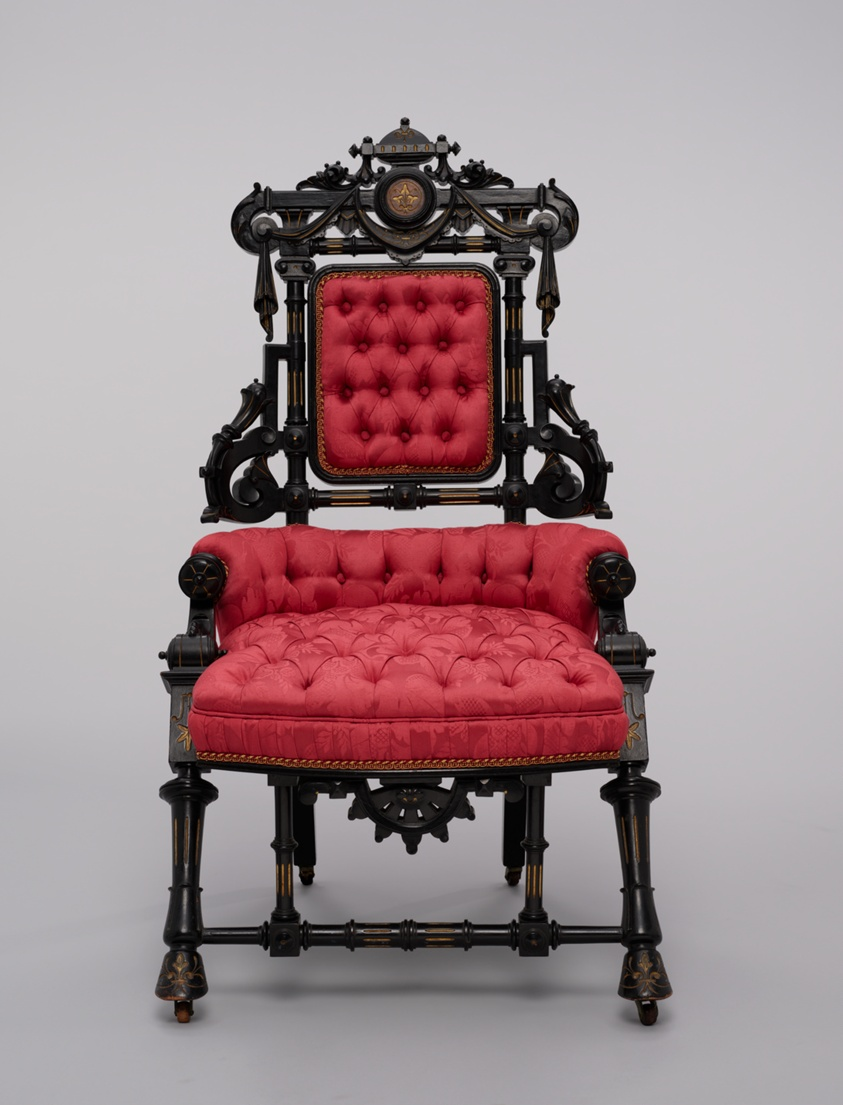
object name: Furniture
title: Armchair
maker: George Jakob Hunzinger (American, born Germany, 1835–1898)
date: About 1869; patented in 1869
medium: Ebonized walnut with gilt decoration and upholstery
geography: New York City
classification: seating; furniture; american decorative arts; american arts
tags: furniture